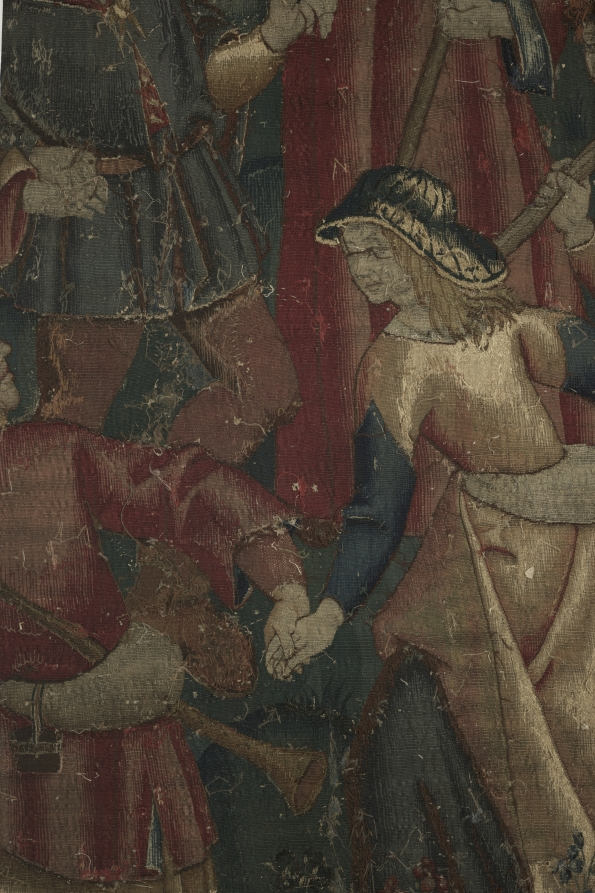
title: Shepherds in a Round Dance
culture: Netherlands, early 16th century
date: around 1500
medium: Wool and silk: tapestry weave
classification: Tapestry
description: Late medieval tapestries often use a limited yet contrasting color palette to portray stylized images. The expressions of these figures, for example, are conveyed more by their postures than by their faces. Four shepherds and shepherdesses join hands and dance to the music of a bagpiper at the far right, while a lord and two ladies on the left look on. A dog and sheep amid blossoming plants and trees contribute to the festive pastoral scene in front of a castle.